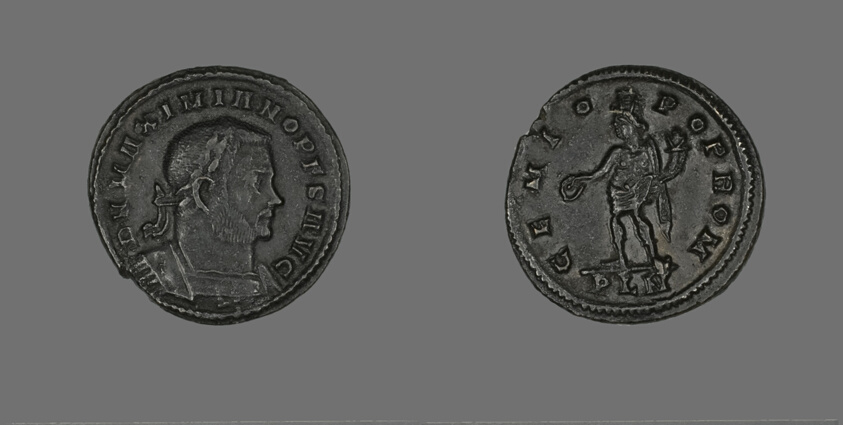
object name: Coin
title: Coin Portraying Emperor Galerius Maximianus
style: imperial (roman), ancient, roman (ancient, style or period)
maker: Roman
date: 305 (?)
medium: Bronze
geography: Roman Empire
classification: coin; ancient art